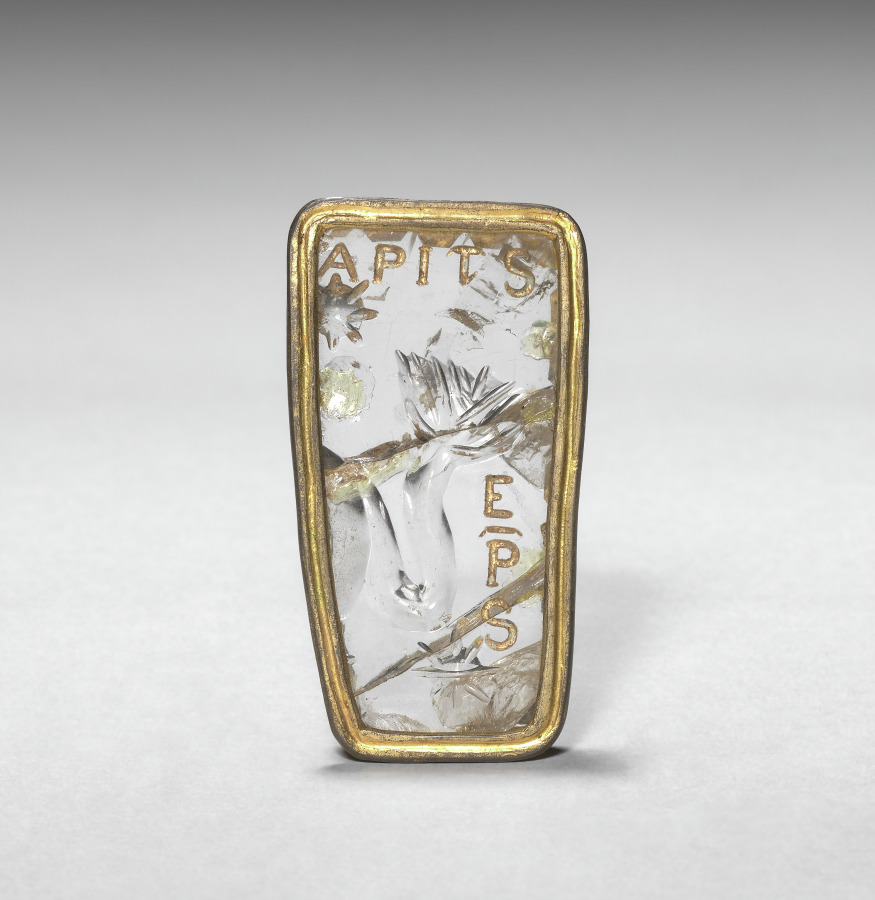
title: Intaglio with the Tail of a Sea Monster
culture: Early Christian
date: 300s CE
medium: rock crystal and gilt silver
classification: Glyptic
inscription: inscribed at top: APITS; at side: EPS.